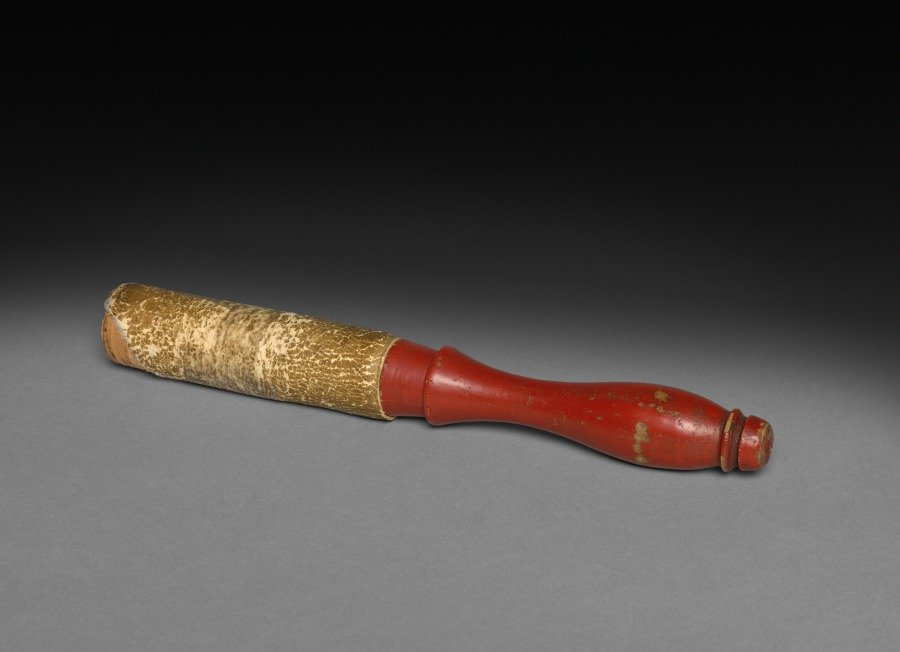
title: Gong Beater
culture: Japan, Edo period (1615–1868)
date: early to mid-1800s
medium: bronze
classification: Metalwork